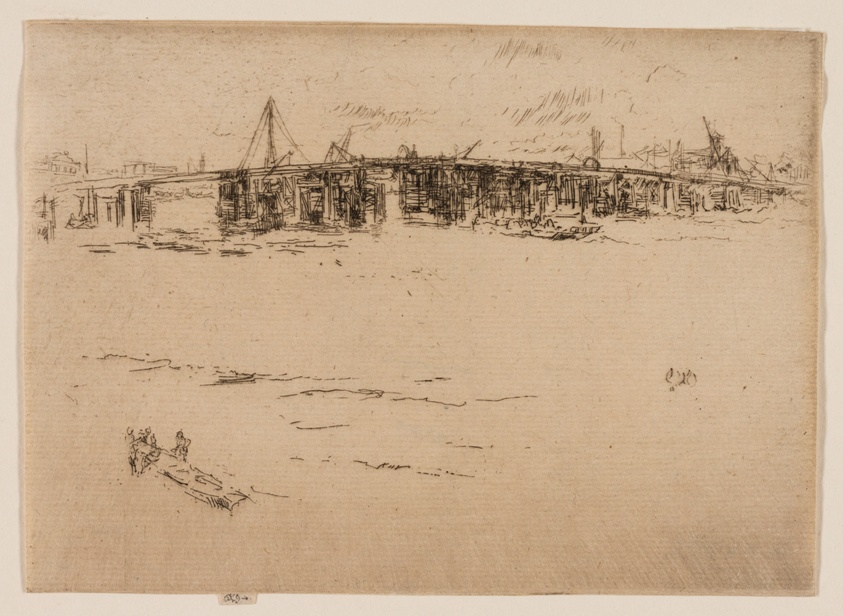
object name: Print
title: Old Battersea Bridge, No. 2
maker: James McNeill Whistler (American, 1834-1903)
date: 1887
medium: Etching and drypoint with foul biting in brown ink on cream laid paper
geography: United States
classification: etching; foul biting; print; prints and drawing; drypoint; paper